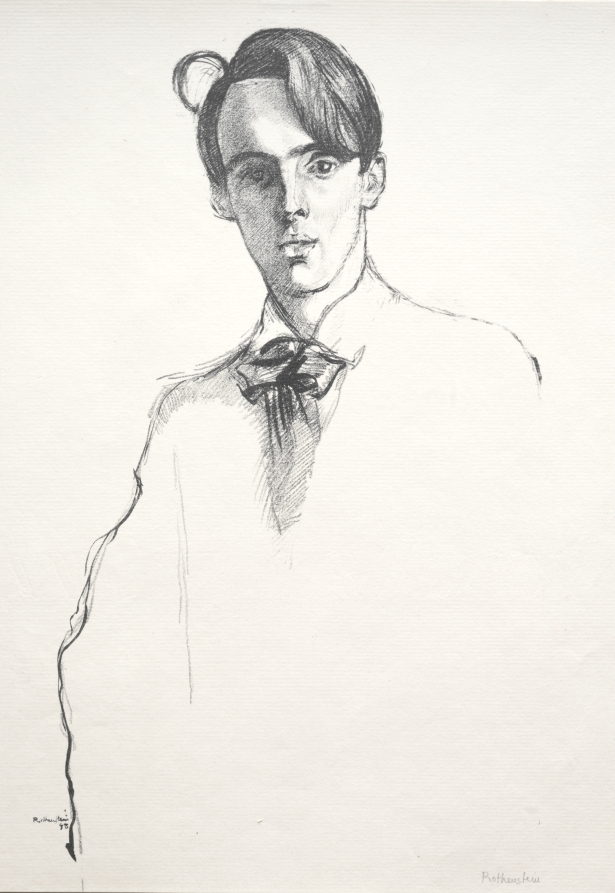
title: William Butler Yeats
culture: England, late 19th Century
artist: William Rothenstein (British, 1872–1945)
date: 1898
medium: lithograph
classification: Print